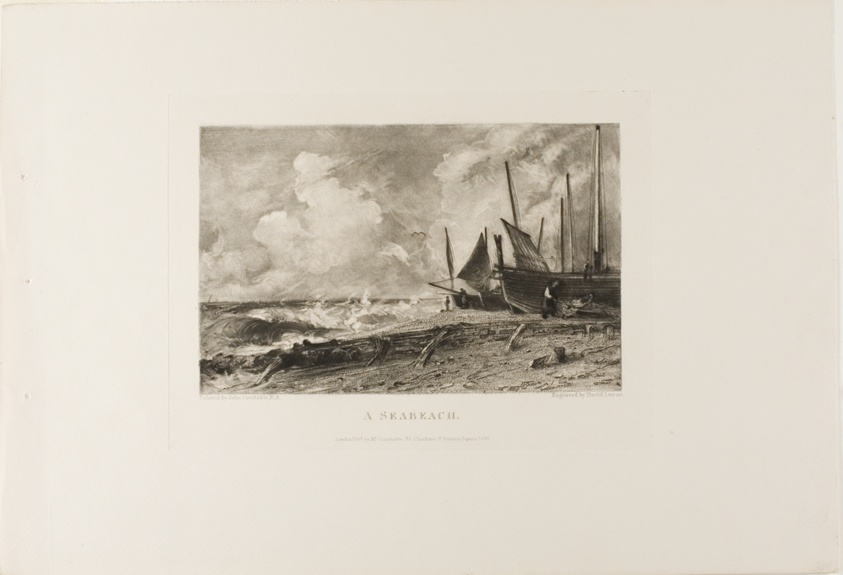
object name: Print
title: A Seabeach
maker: David Lucas (English, 1802-1881); after John Constable (English, 1776-1837)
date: 1830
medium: Mezzotint in black ink on heavy ivory wove paper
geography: England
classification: mezzotint; print; prints and drawing